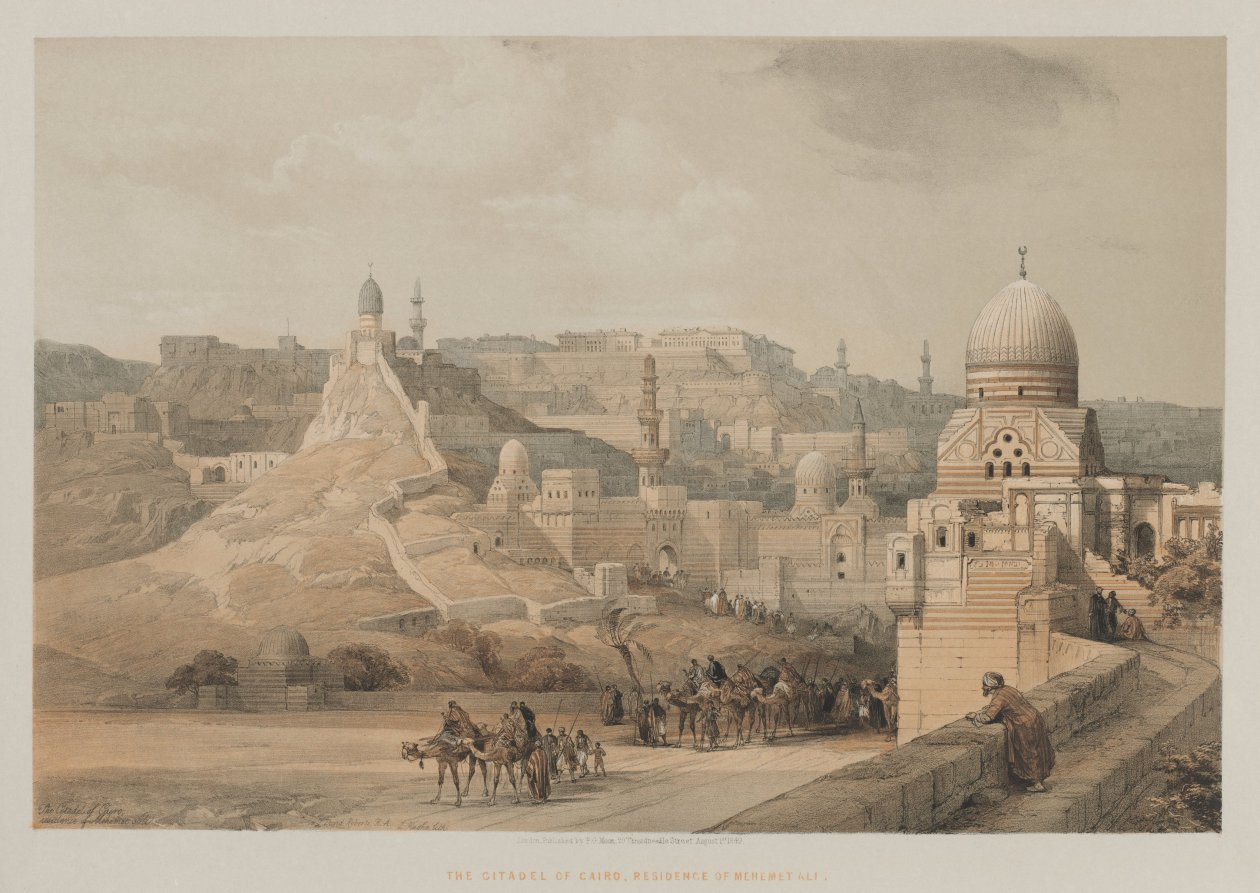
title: Egypt and Nubia, Volume III: The Citadel of Cairo, Residence of Mehemet Ali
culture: England, 19th century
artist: Louis Haghe (British, 1806–1885)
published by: F. G. Moon, 20 Threadneedle Street, London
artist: after David Roberts (Scottish, 1796–1864)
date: 1849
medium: color lithograph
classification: Print